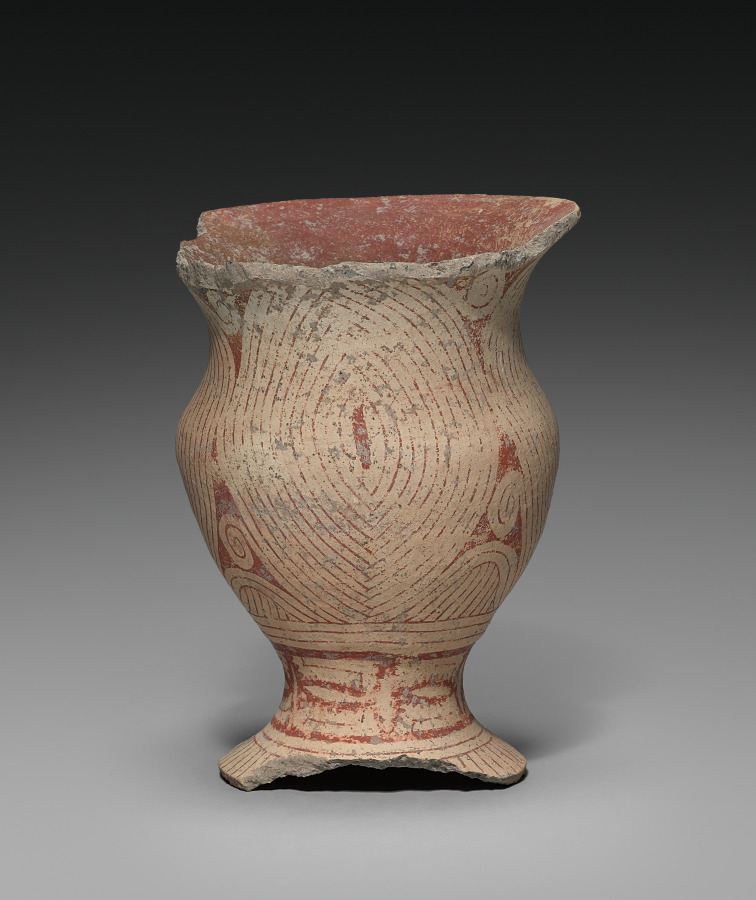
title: Jar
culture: Thailand, Ban Chiang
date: 300 BCE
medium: earthenware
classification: Ceramic